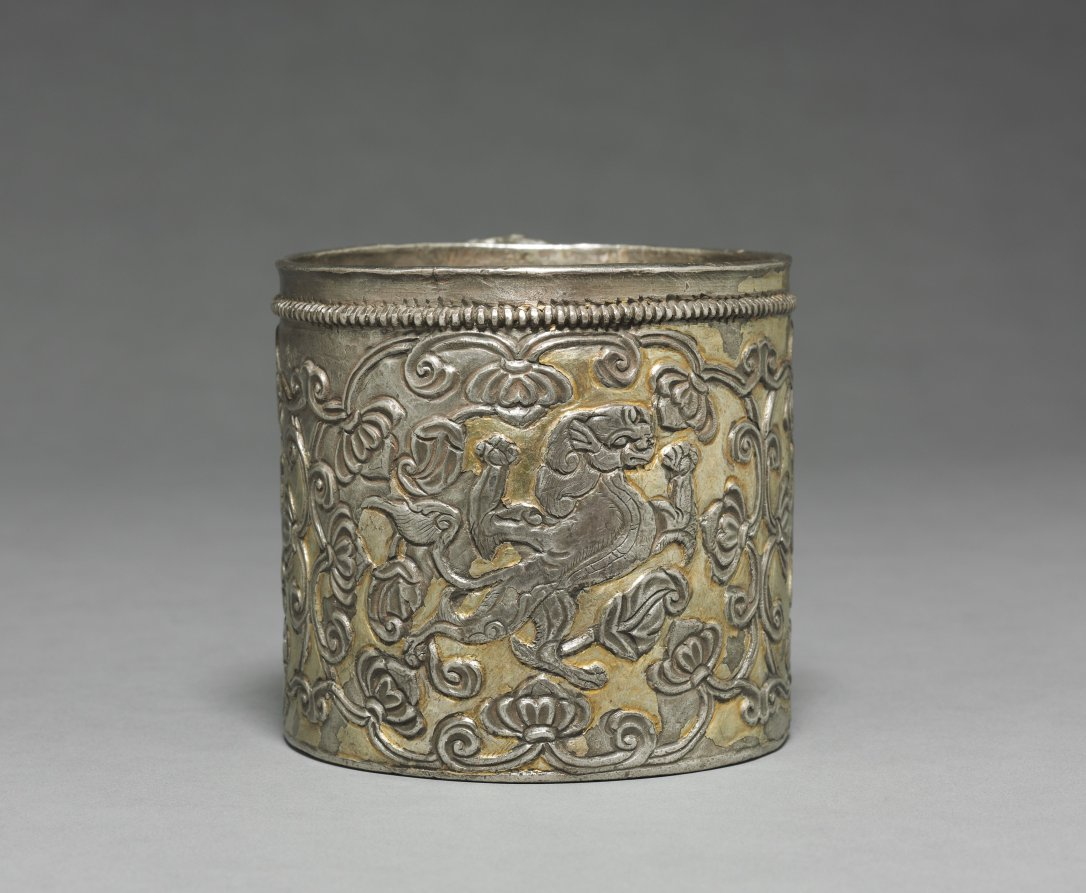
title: Beaker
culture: Central Asia (Sogdiana) or Tibet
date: c. late 600s–early 700s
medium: silver with gilding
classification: Silver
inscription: Inscribed on bottom of the cup: "Phan shing gong skyes gui sug byad (or byang)"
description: The circular shapes of the cup’s handle feature a flat edge on which the user rested their thumb for better grip, a design characteristic of silver objects made during the 700s by Sogdian artists, who traveled from Central Asia along international trade routes. An ownership inscription in Tibetan script on the underside of the cup identifies the vessel as a personal possession. The circles and lines carved below this inscription are likely measurements recording the weight of the silver used for the cup.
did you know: This cup depicts two lions and a lionlike animal with horns!